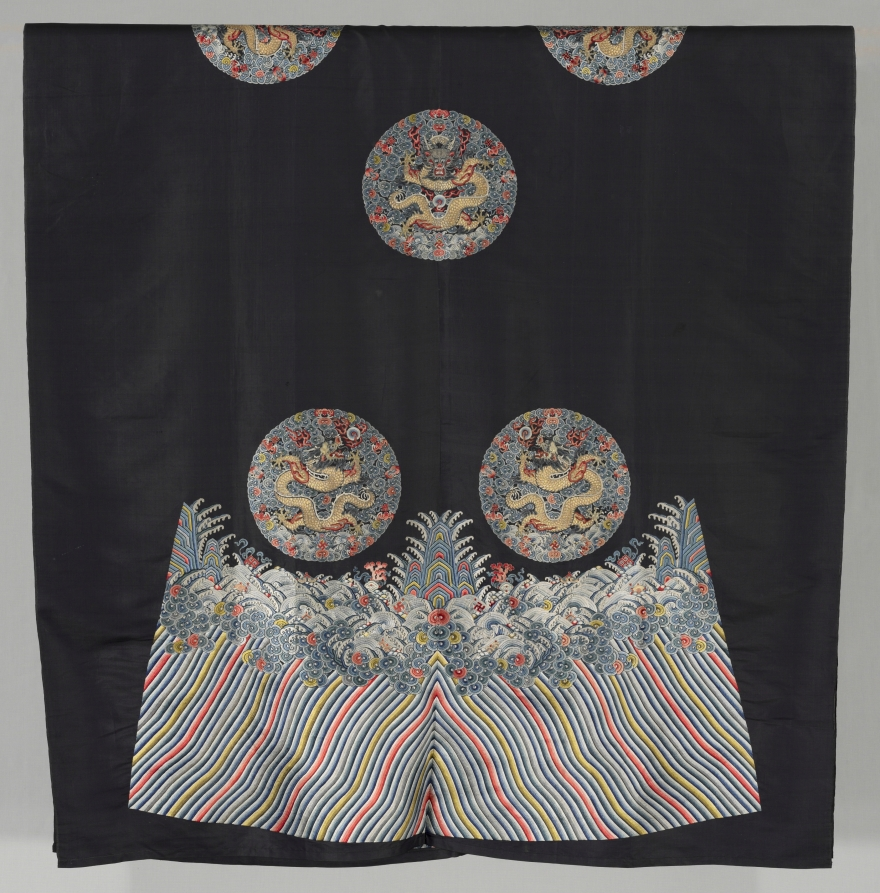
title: Unfinished robe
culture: China, Qing dynasty (1644-1911)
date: 1800–1825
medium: Silk with silk and metal thread embroidery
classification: Garment